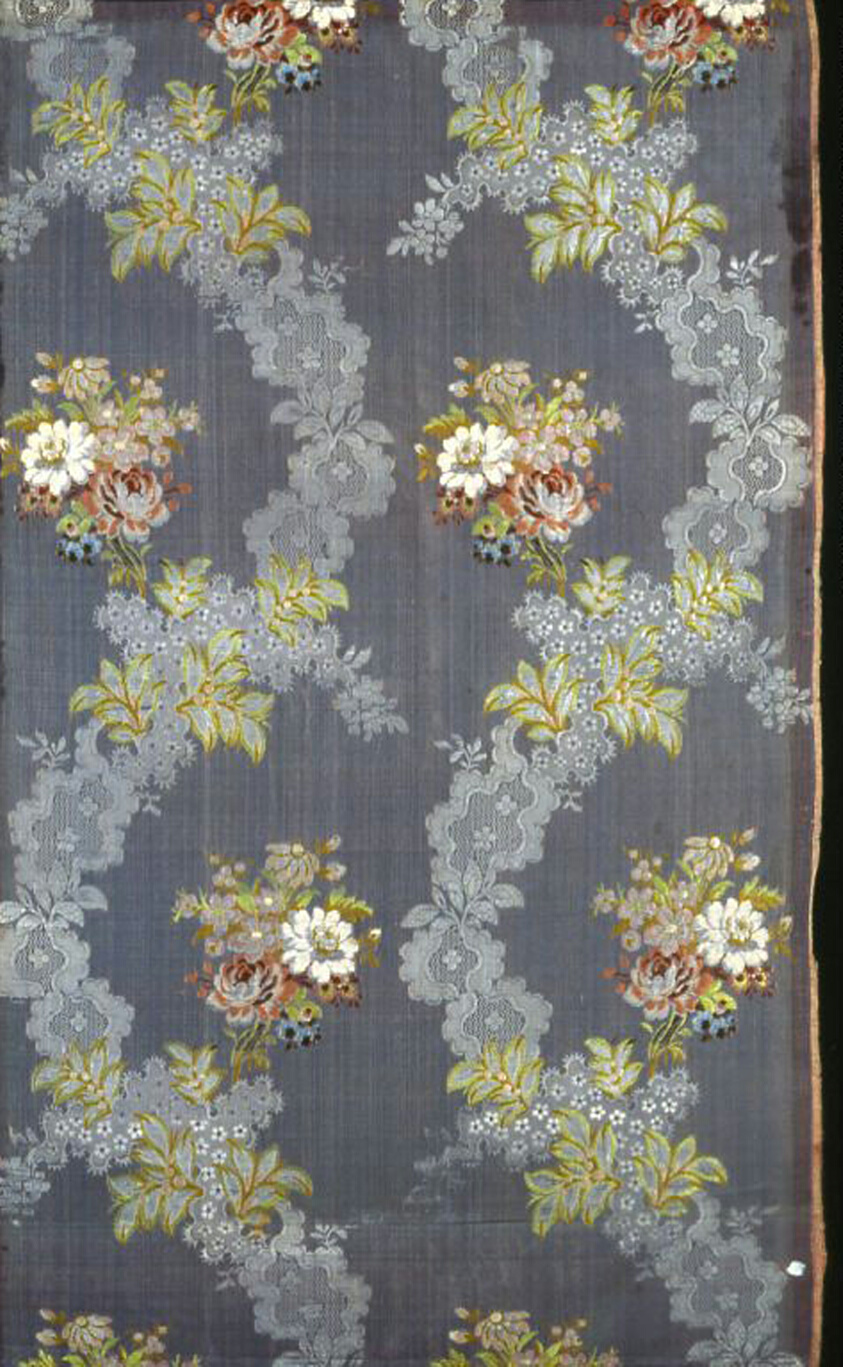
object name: Textile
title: Panel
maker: France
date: Mid–18th century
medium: silk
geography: France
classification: textile; weaving